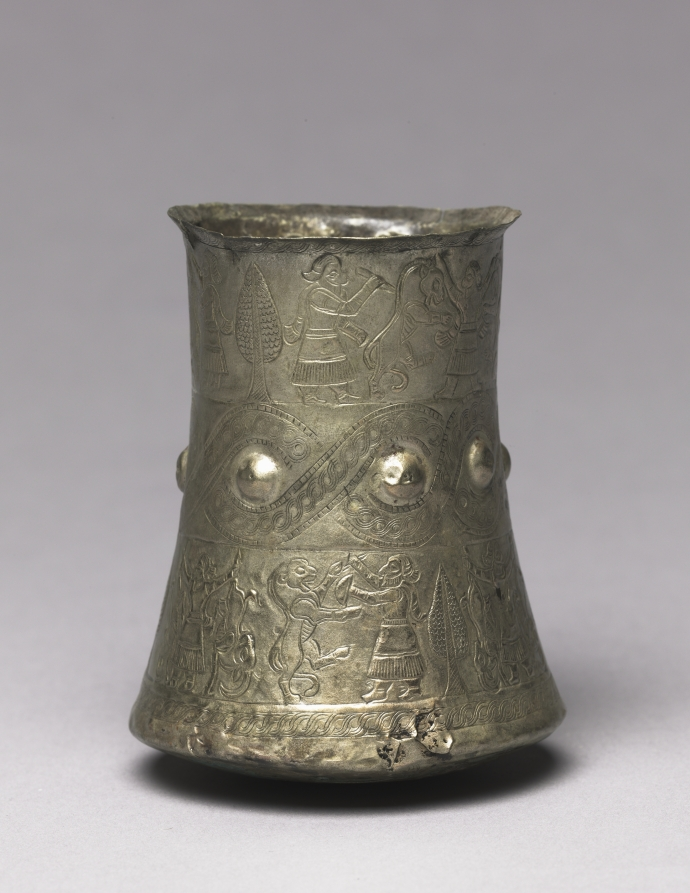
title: Hero and Animal Combat Beaker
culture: Iran, Luristan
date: 900–700 BCE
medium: silver, repoussé, engraved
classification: Metalwork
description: On this silver beaker, two registers show men grabbing felines by the paws and stabbing rearing beasts amid stylized trees. The bearded men wear long robes and scarves, carefully created using repoussé. A large guilloche pattern (interlacing curved lines) containing a smaller guilloche pattern and punctuated by round bosses fills the space between the registers. This beaker may show a Master of Animals or a hero in combat, popular motifs in the ancient Near East.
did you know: Repoussé is a technique of hammering into metal to create designs and figures.